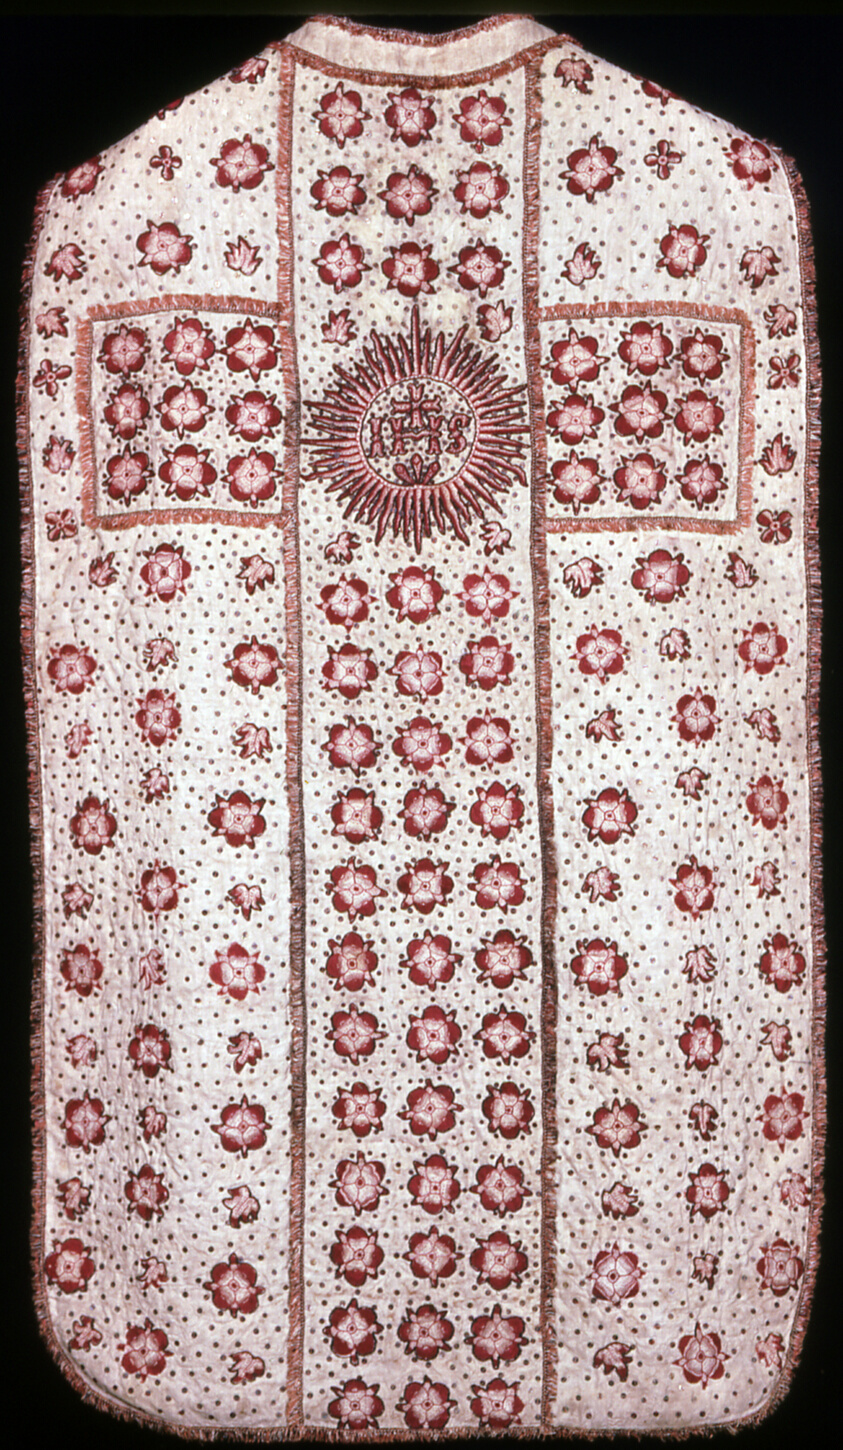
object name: Textile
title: Chasuble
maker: England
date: 17th century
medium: Silk, plain weave; appliquéd with linen, plain weave; embroidered with silk in chain, individual back, running, and stem stitches; spangles; edged with silk, warp-faced cut weft fringe; lined with silk, plain weave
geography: England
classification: textile; needlework (visual works); liturgical